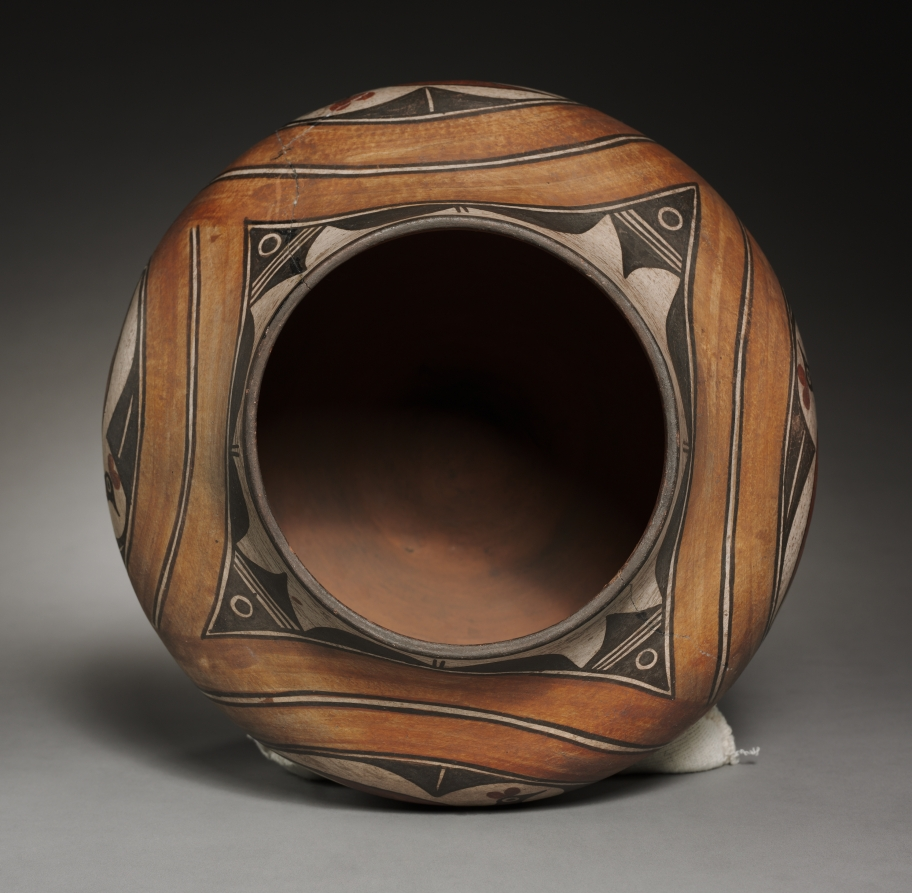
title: Water Jar/ Olla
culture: Southwest, Pueblo, Zia, Post- Contact Period, 20th century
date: 1900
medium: ceramic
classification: Ceramic